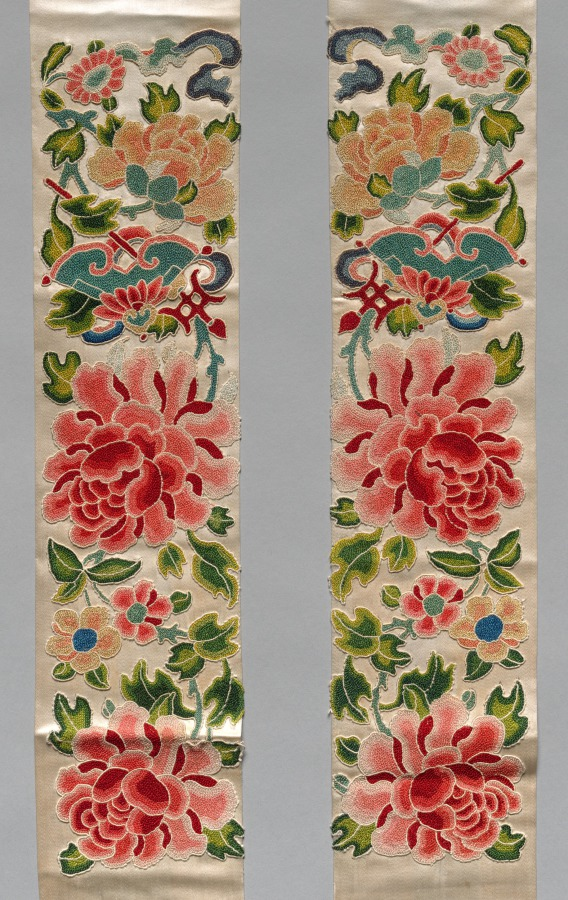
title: Sleeve Bands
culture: China, Qing dynasty (1644-1911) or Republican period (1912-49)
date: 1880–1940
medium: embroidery, silk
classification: Garment